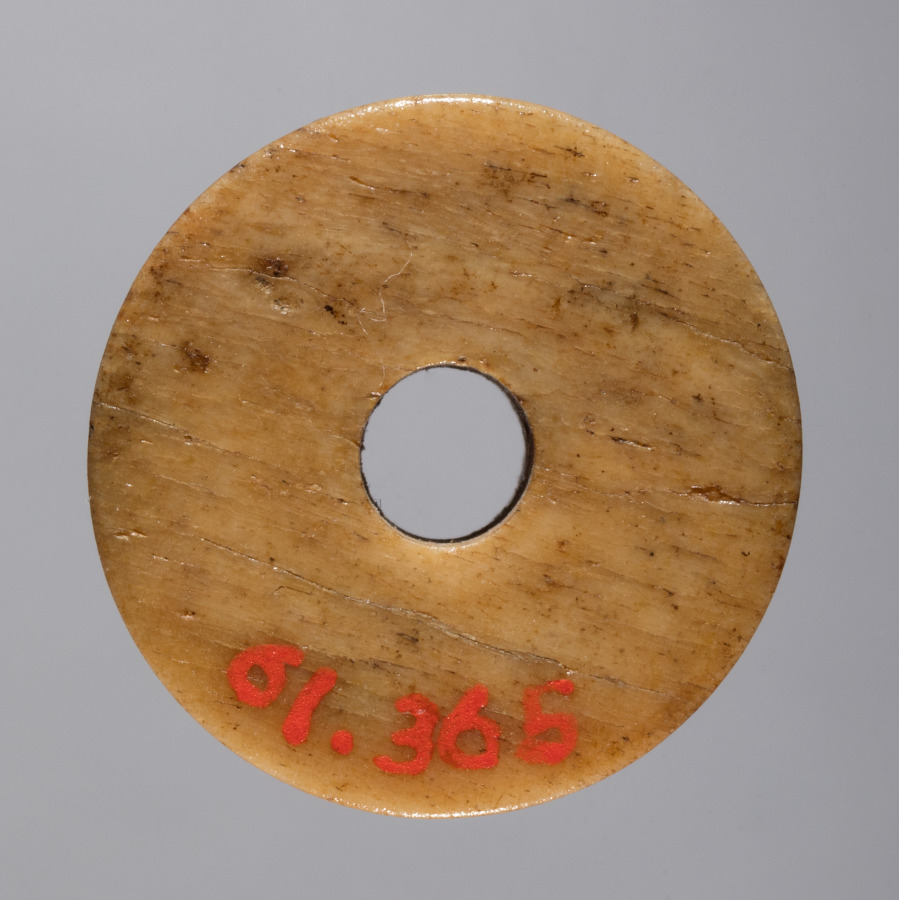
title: Spindle Whorl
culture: Iran, early Islamic period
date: 700s - 900s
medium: bone, incised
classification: Spindle Whorl